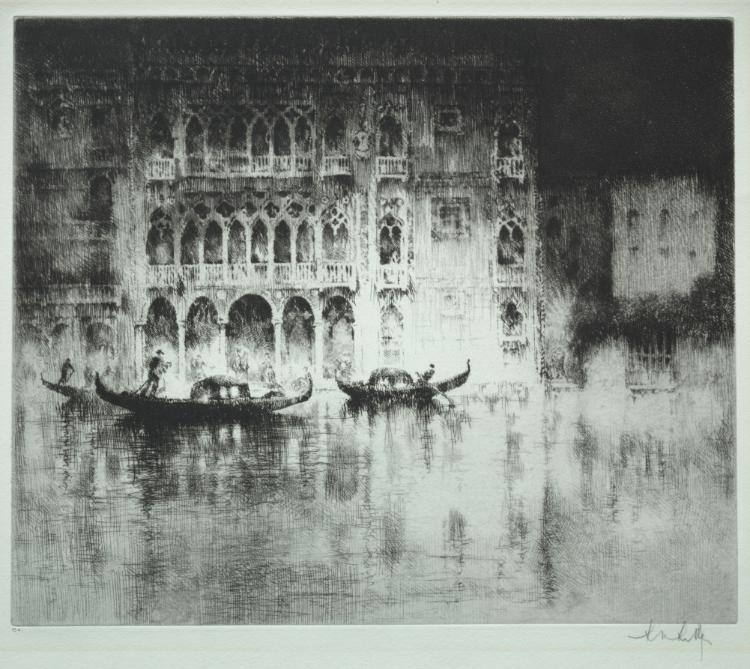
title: Venetian Set: No. 1, Palazzo Ca d'Oro, Venice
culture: England, 20th century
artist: Sidney Mackenzie Litten (British, 1887–1934)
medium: etching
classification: Print